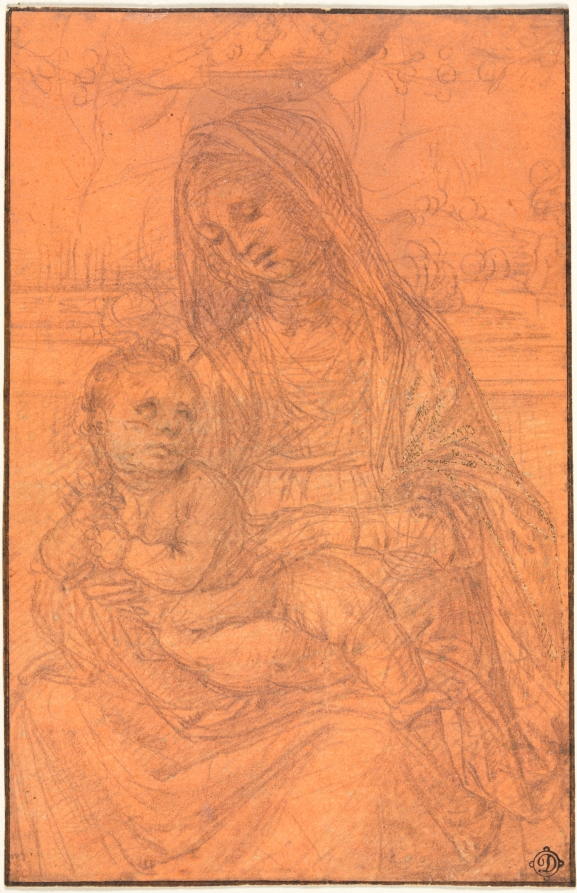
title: The Virgin and Child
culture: Italy, 16th century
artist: Lorenzo di Credi (Italian, 1459–1537)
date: c. 1510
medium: metalpoint, (losses on left sleeve of the Madonna restored in pen and brown ink?); framing lines in black and brown ink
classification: Drawing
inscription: VERSO, lower right, in graphite: Lorenzo di Cre[di, paper skinned] ; VERSO OF SECONDARY SUPPORT (now removed), lower left, in graphite: No. 5 [underlined]